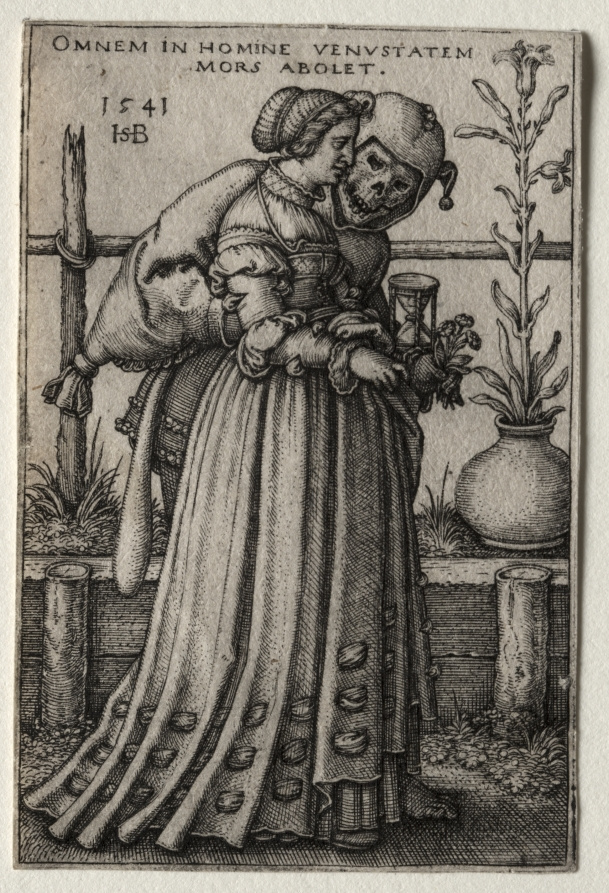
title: The Lady of Death Masquerading as a Fool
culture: Germany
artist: Hans Sebald Beham (German, 1500–1550)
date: 1541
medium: engraving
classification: Print